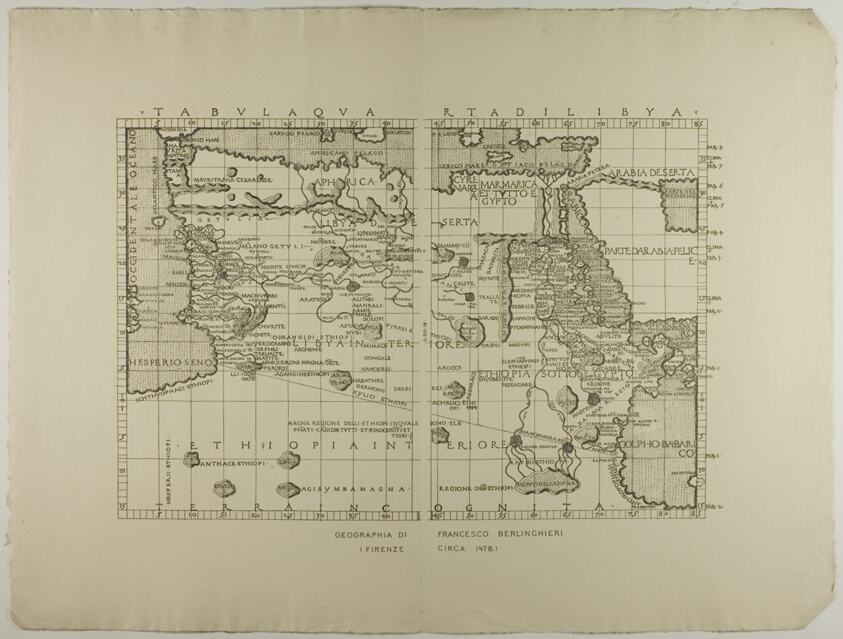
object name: Print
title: Map of Libya, the Middle East and North Africa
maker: Unknown Artist (English, 19th century); reproduction after a map by Francesco Berlinghieri (Italian, 1440-1501)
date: 1478, reprinted 1889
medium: Lithograph on cream laid paper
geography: Italy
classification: reproduction; print; prints and drawing